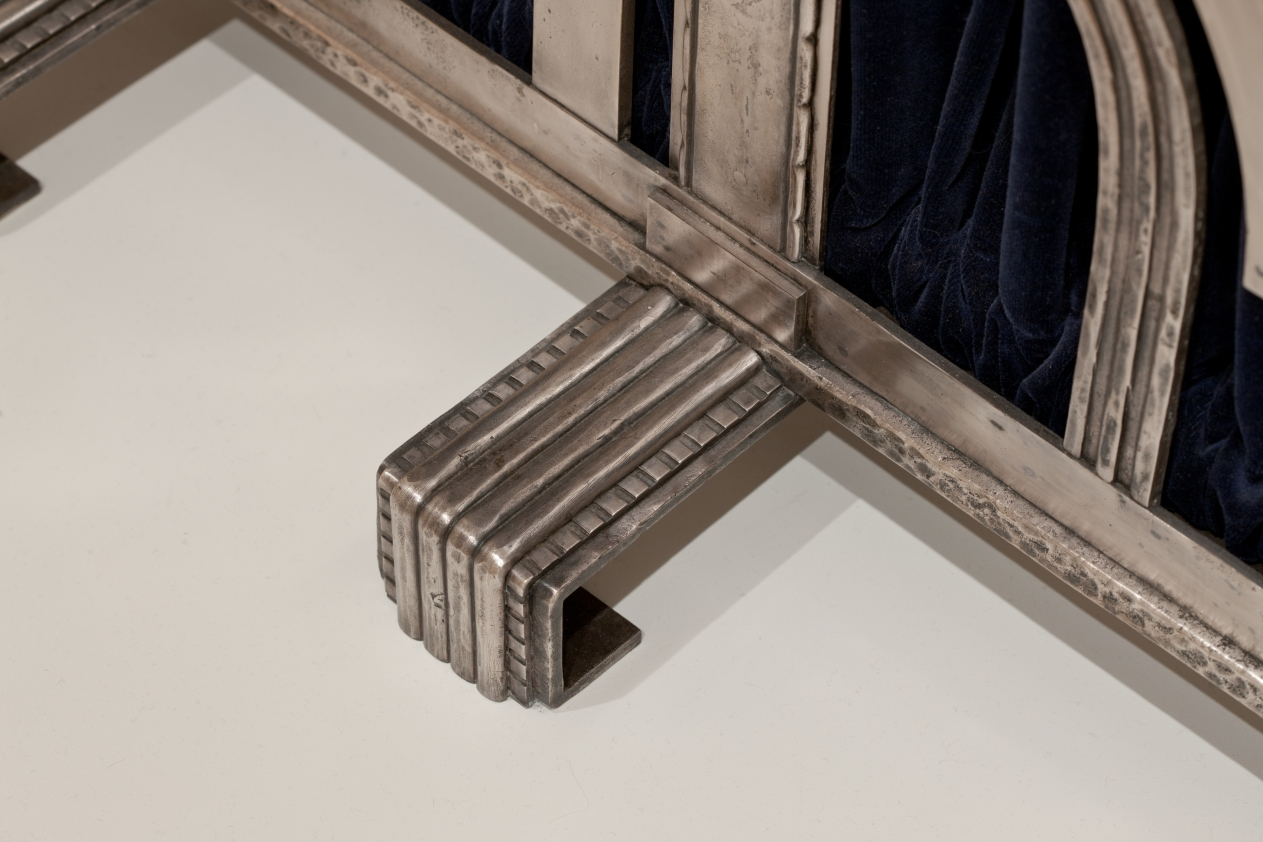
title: Muse with Violin Screen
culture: America, Ohio, Cleveland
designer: Paul Fehér (American, born Hungary, 1898–1990)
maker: Rose Iron Works (America, Ohio, Cleveland, est. 1904)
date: 1930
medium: Steel, brass; silver and gold plating, cotton velveteen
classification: Metalwork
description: Since the early years of the 20th century, the Rose Iron Works, a Cleveland supplier of architectural ornament, has produced distinguished metalwork. The company’s founder, Martin Rose, was born in Austria-Hungary and studied ornamental metalsmithing in Vienna prior to immigrating to Cleveland in 1902. In the 1920s, he hired a talented young Parisian designer, Paul Fehér, to work for the firm. Fehér’s designs, culminating in this massive screen, brought a modern European sensibility to the Rose Iron Works production. With its geometric patterning, highly stylized and abstracted natural forms, and the central figure reminiscent of the celebrated jazz singer Josephine Baker, this screen reflects the classic motifs of Art Deco design.